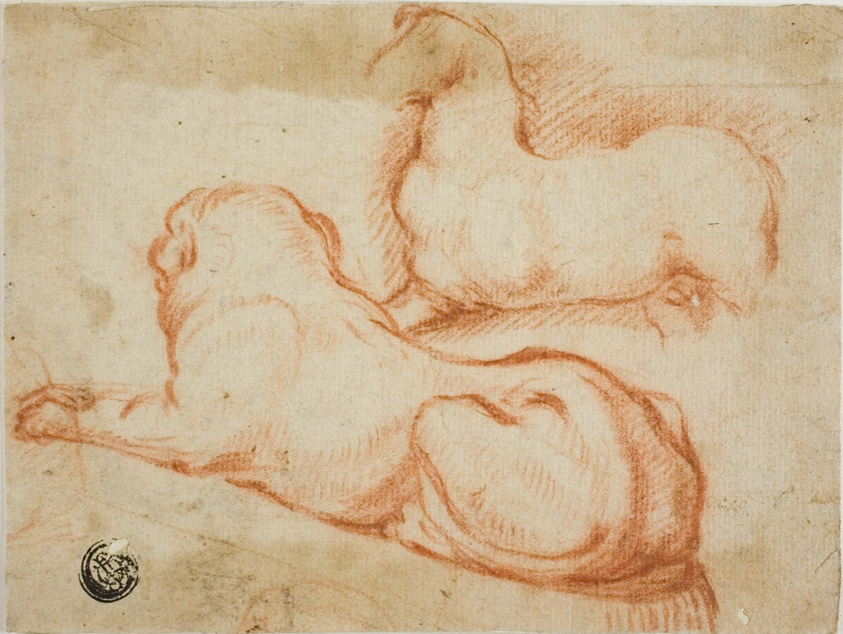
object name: Drawing and Watercolor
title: Sketch of Horse and Dog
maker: Dirk Valkenburg (Dutch, 1675-1721)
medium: Red chalk, on tan laid paper, laid down on ivory laid paper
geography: Holland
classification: chalk; drawings (visual works); prints and drawing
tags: horses, animals, dogs